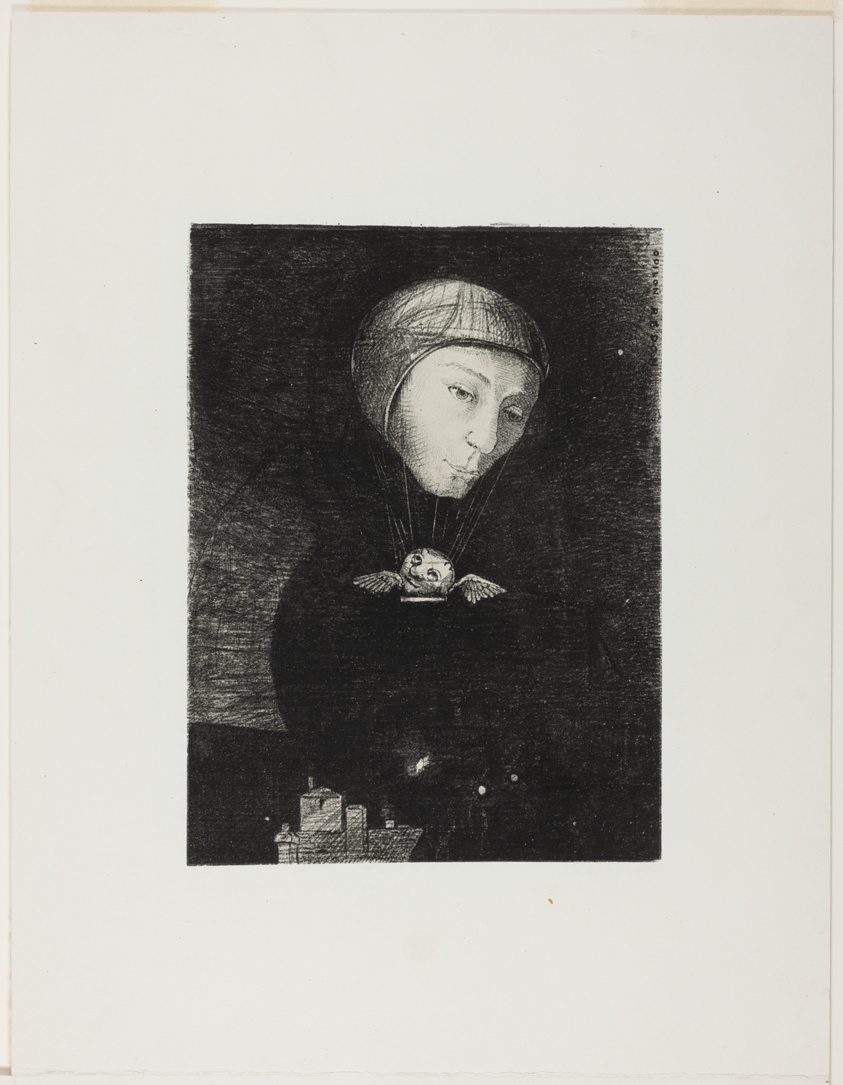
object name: Print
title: Sad Ascent, plate nine from In Dreams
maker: Odilon Redon (French, 1840-1916)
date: 1879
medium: Lithograph on mounted ivory China paper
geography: France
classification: lithograph; print; prints and drawing; paper